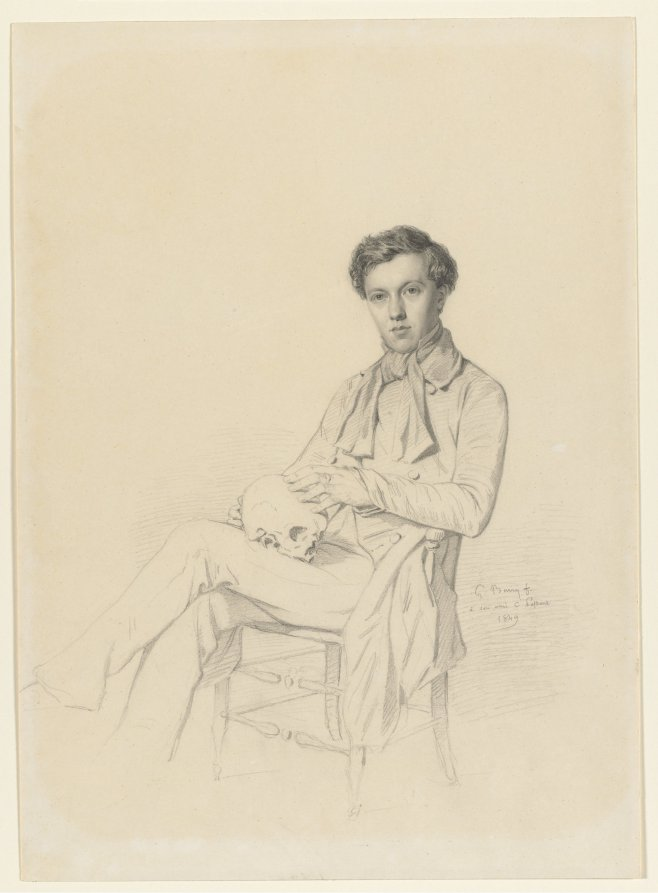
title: Charles Passant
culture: France, 19th century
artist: Gustave Edward Barry (French)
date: 1849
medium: graphite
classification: Drawing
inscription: signed, lower right, in graphite: G Barry f. / à son ami C Passant / 1849 ; VERSO, lower right, in graphite: [illegible] HXX [partially erased] ; lower right, in graphite D H05 CCE $1/2 [over the previous inscription]